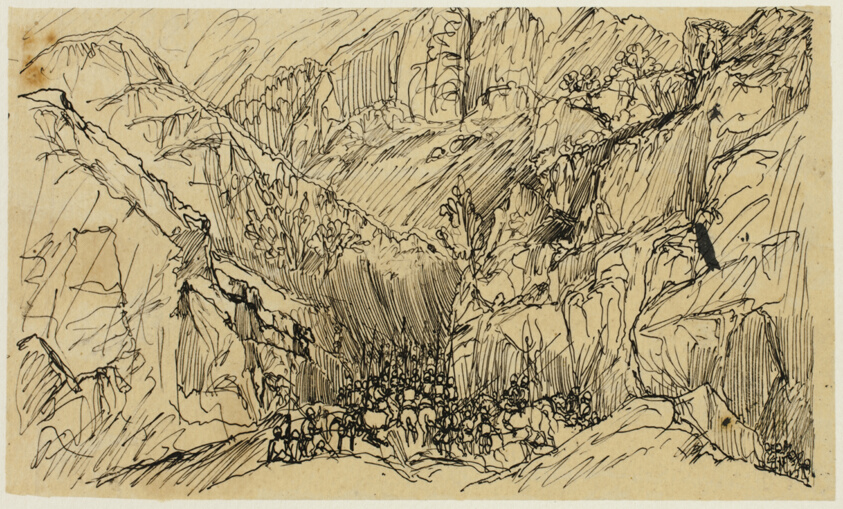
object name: Drawing and Watercolor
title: Troops in the Pass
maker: Rodolphe Bresdin (French, 1825-1885)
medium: Pen and black ink, on tan wove paper, laid down on ivory wove paper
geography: France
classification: pen and ink drawings; drawings (visual works); prints and drawing